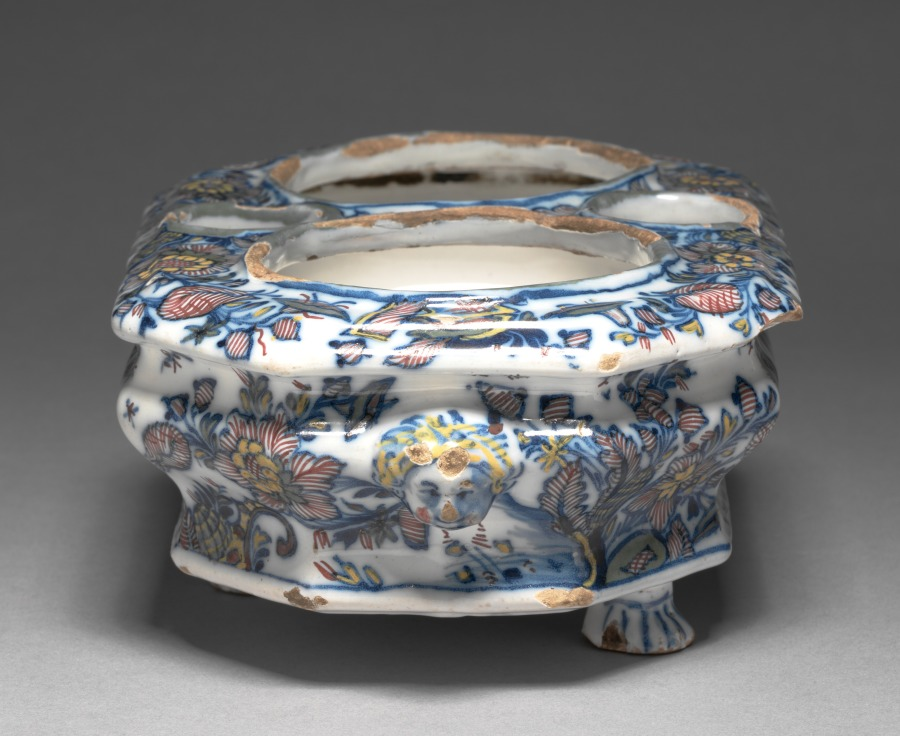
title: Cruet Stand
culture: France, Marseilles, 18th century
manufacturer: Héraud- LeRoy Factory (French)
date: c. 1740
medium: Tin- glazed earthenware (faience) wth underglaze blue decoration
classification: Ceramic